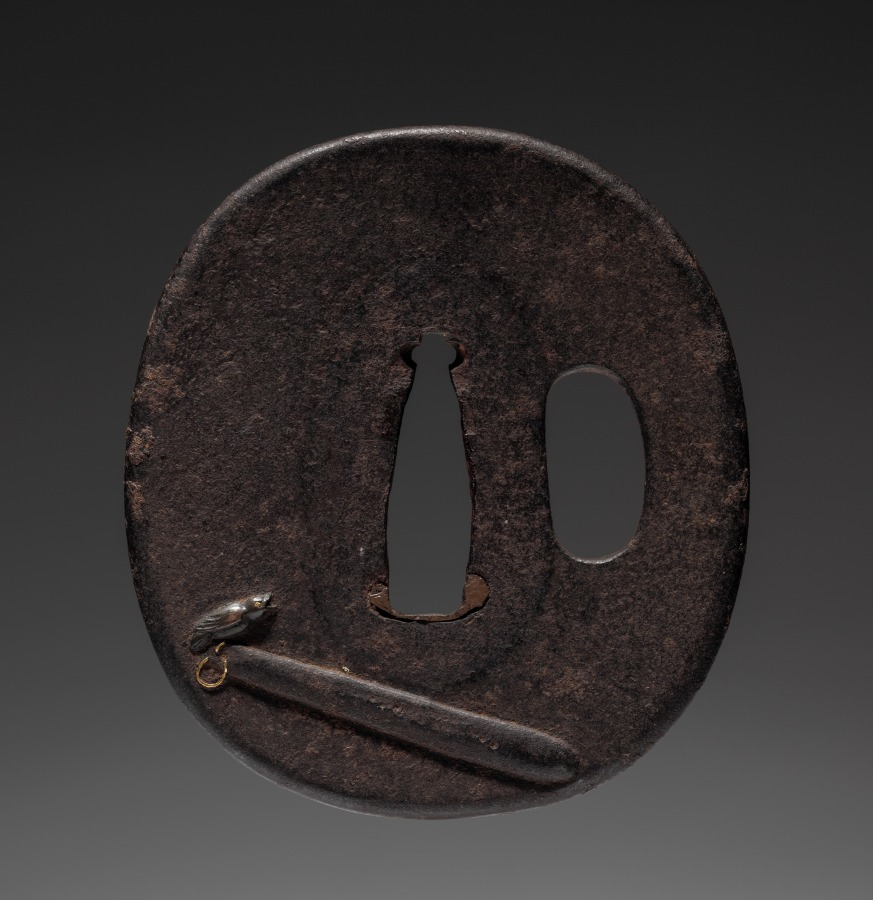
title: Sword Guard (Tsuba)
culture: Japan, possibly Edo period (1615-1868)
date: c. 1615–1868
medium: iron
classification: Arms and Armor